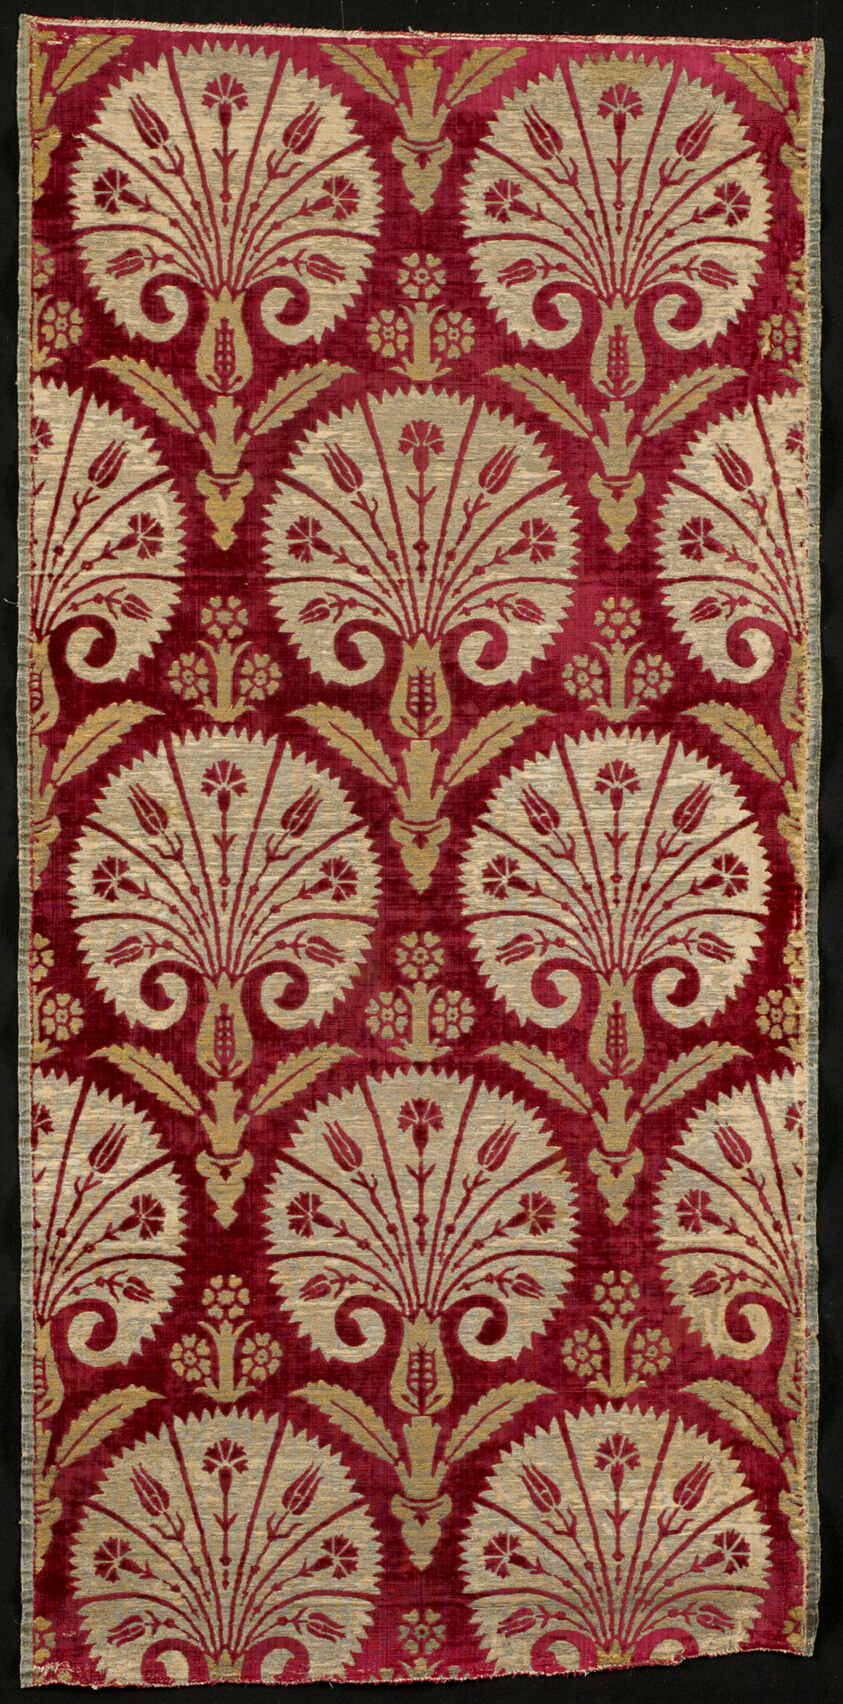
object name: Textile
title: Panel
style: turkish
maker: Turkey, Bursa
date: 1575/1625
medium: Silk, cotton, and gilt- and silvered-metal-strip-wrapped silk, satin weave with supplementary brocading wefts and cut voided velvet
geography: Turkey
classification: textile; weaving - velvet